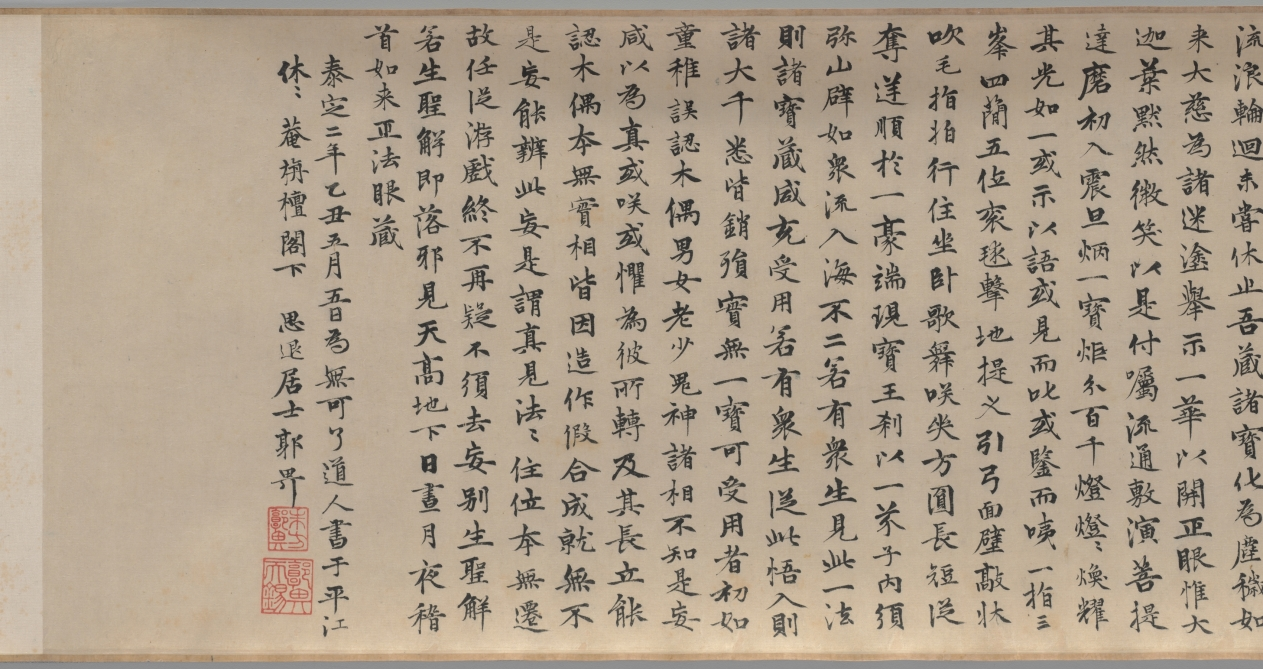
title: Barbarian Royalty Worshiping the Buddha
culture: China, Northern Song dynasty (960-1127)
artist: attributed to Zhao Guangfu (Chinese, c. 923–976)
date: 900s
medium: Handscroll; ink and color on silk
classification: Painting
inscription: 佛法入中國千餘年。殆是家有其像。見之者悉起敬心，不當以古今畫手分別也。 子昂 [印]趙氏子昂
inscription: Colophon by Guo Bi (1280–1335): A transcription of "Zheng fa yan zang ming bing xu" 正法眼藏銘幷序 by Wuwei Jushi 無為居士. Signature: Situi Jushi Guo Bi 思退居士郭畀. 2 seals.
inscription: Spurious artist's signature: Zhao Guangfu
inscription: 1 seal of the Li family (Yuan Dynasty)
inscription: 14 seals of Qianlong Emperor (r. 1736–95)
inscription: 1 seal of Jiaqing Emperor (r. 1796–1820)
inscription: 1 seal of Xuantong Emperor (r. 1909–11)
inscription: 1 official seal of the Yuan dynasty, “Tian li zhi bao 天曆之寶” (Treasure of Tianli).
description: This painting begins on the right with 15 people following a dignified figure wearing headgear with twin pheasant feathers. He extends an incense burner toward the Buddha, who is seated on his lotus throne and flanked by two haloed disciples and two Heavenly Kings. The worshipers’ diverse physical features, regional finery, and religious affiliations suggest the universal appeal of Buddhism. The imagery was inspired by the foreign envoys who frequently came to the Chinese court to give tribute to the emperor. At the time, all outsiders were considered “barbarians,” so their presence was seen as acknowledgment of China’s political and cultural power.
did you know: Sixteen "barbarians" pay homage to the Buddha, who is seated on a lotus throne with two disciples and two guardians.